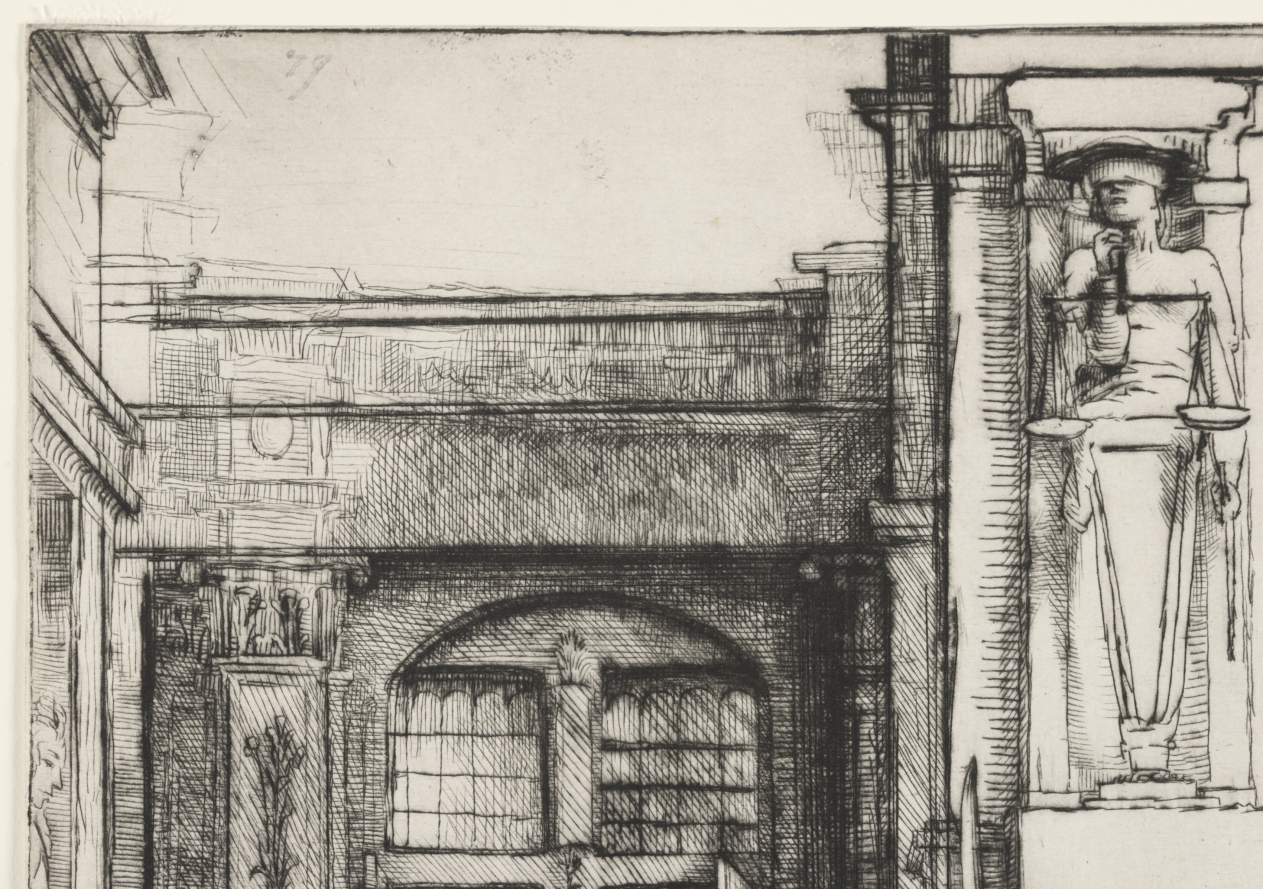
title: Ecce Homo. Christ Presented to the People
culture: Netherlands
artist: Rembrandt van Rijn (Dutch, 1606–1669)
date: 1655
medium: drypoint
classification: Print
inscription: Recto, upper left, in graphite: 79; lower left: FPS. Verso, in purple ink: Prince of Liechtenstein or Colnaghi for Liechtenstein stamp; in black ink, Zinser stamp, castle tower (rook chess piece); along side, in graphite: No. 36; along top: (illegible) name; upper left, in graphite: No 79 P(?) G (?) La Second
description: Rembrandt was an experimental and innovative printmaker and the first to execute works in pure drypoint on this monumental scale. Drypoint produces blurred lines and rich, velvety shadows, but these effects are lost as the plate wears. A limited number of rich impressions exist like this fine example of the fifth state, which demonstrates how Rembrandt redefined the expressive potential of printmaking. Rembrandt’s habit of drawing from life made him a keen observer of behavior and body language, endowing his biblical scenes with a human dimension and veracity not seen previously. The throng in Christ Presented to the People represents a cross section of the population and reflects the pictorial tradition that common humanity condemned Christ. Large areas of the imposing building, symbolizing the crushing weight and authority of the state, remain unworked so that blank white paper seems radiant in contrast to rich black shadows.